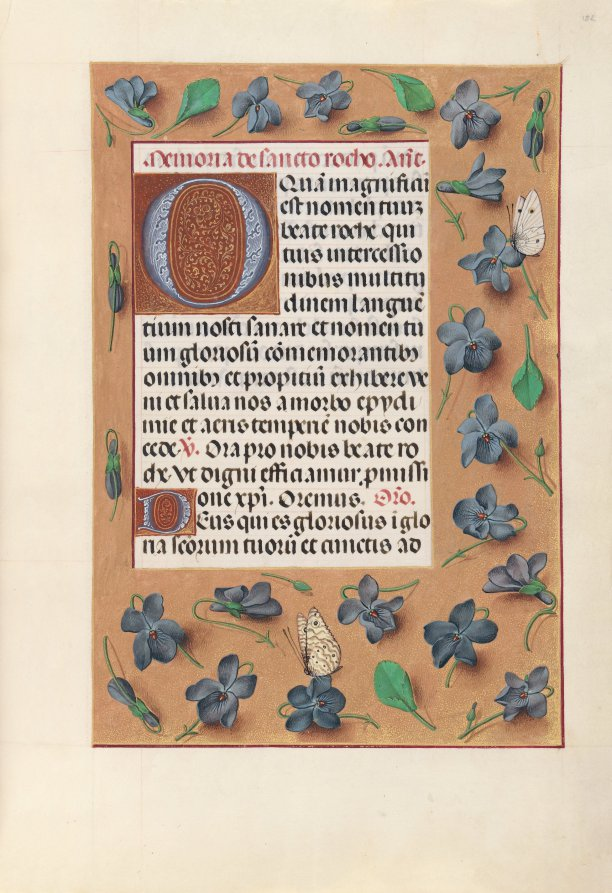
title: Hours of Queen Isabella the Catholic, Queen of Spain: Fol. 182r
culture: Flanders, Ghent and Bruges, late 15th century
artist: Master of the First Prayerbook of Maximillian (Flemish, c. 1444–1519)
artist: and Associates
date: c. 1500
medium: ink, tempera, and gold on vellum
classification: Bound Volume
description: This manuscript was illuminated by a circle of at least five highly organized manuscript painters active in the Flemish cities of Ghent and Bruges. The principal illuminator was Alexander Bening, who painted the majority of the book's miniatures. Manuscripts produced by this circle of artists are renowned for the decoration of their borders, which typically feature a rich variety of realistically-painted flowers, birds, and butterflies. This prayer book, called a book of hours, was intended not for a cleric, but for the private devotions of a lay person-in this case, Isabella the Catholic, Queen of Spain (1451-1504). Isabella's coat of arms embellishes the book's frontispiece. It is unlikely that the book was commissioned by the Queen herself; rather, she probably received it as a diplomatic gift from someone courting her patronage, perhaps Cardinal Francisco Jimenez de Cisneros. A Franciscan friar, Jimenez was dependent upon Isabella for his advancement, first to the post of Queen's confessor in 1492, and then to Archbishop of Toledo in 1495.